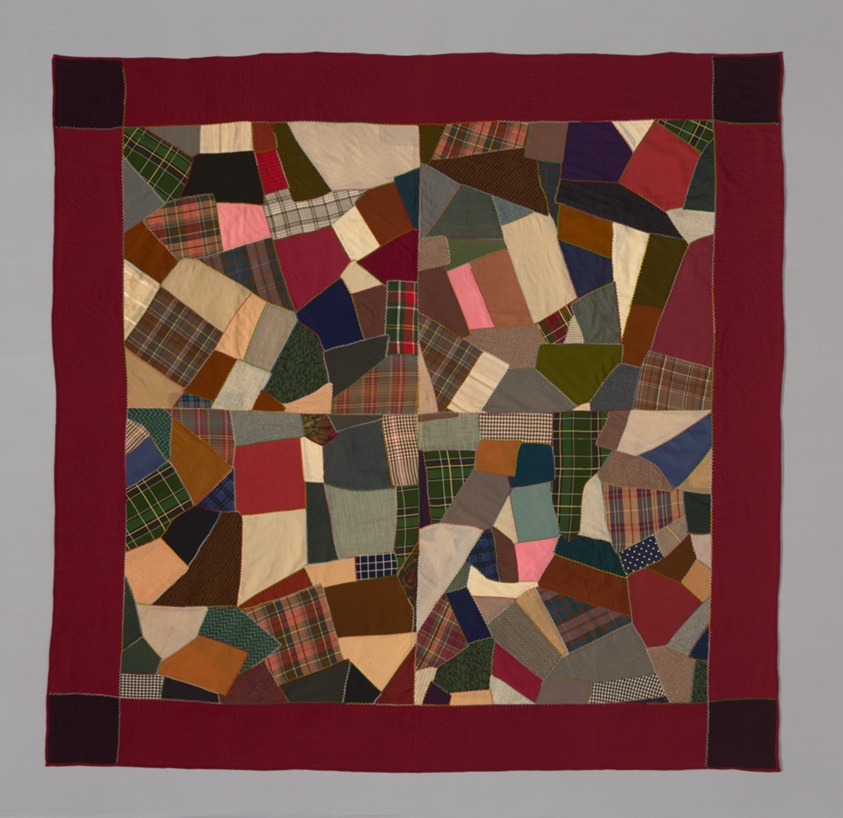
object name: Textile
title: Bedcover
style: amish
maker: Mennonite; United States, Pennsylvania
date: c. 1890/1900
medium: Wool, cotton, and silk; plain, twill, and satin weaves; some self-patterned, some with supplementary patterning wefts; some printed; pieced; embroidered with silk feather stitches; edged with twill weaves; backed with cotton, plain weave; printed; quilted with cotton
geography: Pennsylvania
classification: needlework - quilt; textile